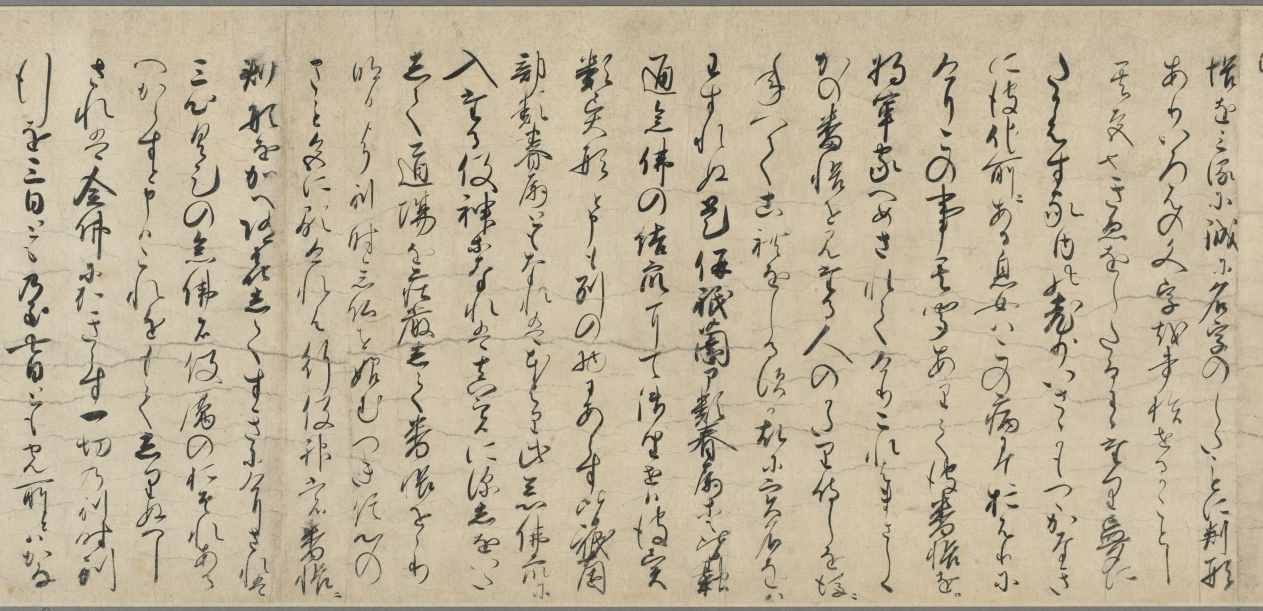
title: The Illustrated Miraculous Origins of the Yūzū Nenbutsu School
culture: Japan, Kamakura period (1185–1333)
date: early 1300s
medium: Handscroll; ink, color, and gold on paper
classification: Painting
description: This painting is the second of a set of two illustrated handscrolls. The first scroll depicts the biography of the Japanese Buddhist monk Ryōnin. This scroll begins with scenes of Ryōnin’s death and relates episodes illustrating the efficacy of following his teachings. Ryōnin asserted the total interconnectedness of all things and the spiritual benefit of chanting the name of the Buddha Amida for one another.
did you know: The other scroll from this two-scroll set belongs to the Art Institute of Chicago.